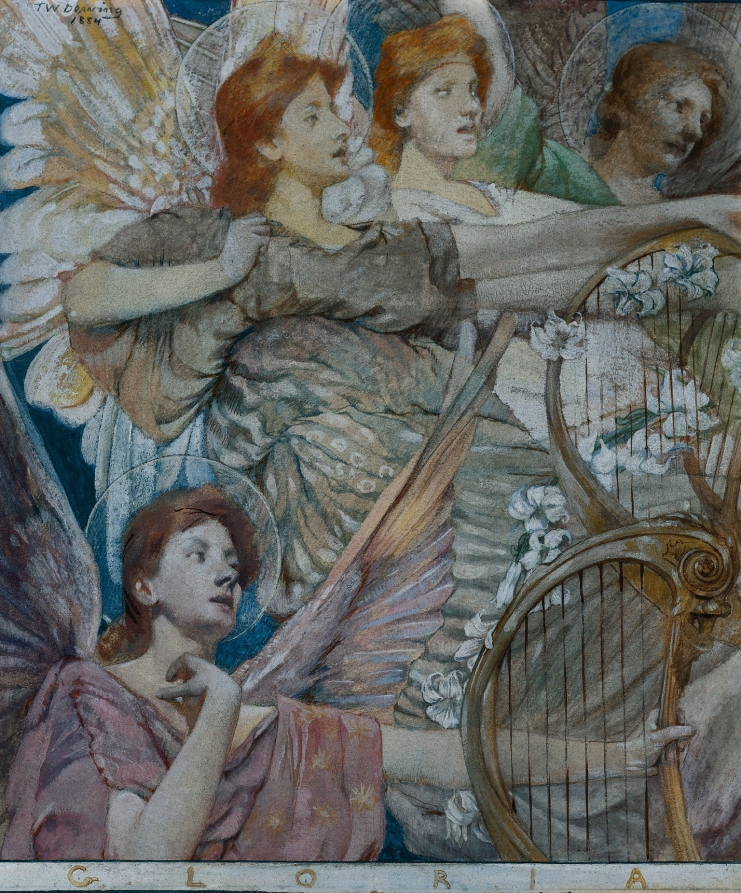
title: Gloria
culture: America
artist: Thomas Wilmer Dewing (American, 1851–1938)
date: 1884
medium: gouache over graphite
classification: Drawing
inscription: signed, upper left, in graphite: T W Dewing / 1884; by artist, across bottom, in watercolor: gloria; verso, center, in graphite: [sTC?] [underlined]; 15 x 162 [underlined] / 165; center left, in graphite: 125 [underlined]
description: Dewing’s small, densely packed composition of four singing angels alludes to depictions of angels playing musical instruments found in 14th-century medieval manuscripts. Angels were traditionally shown playing stringed instruments, whose delicate tones were thought to lift the mind to spiritual matters. The harp, as depicted here, was the instrument most closely associated with heavenly music. With the continuous circling of halos and harps, Dewing suggested a hypnotic, celestial melody.